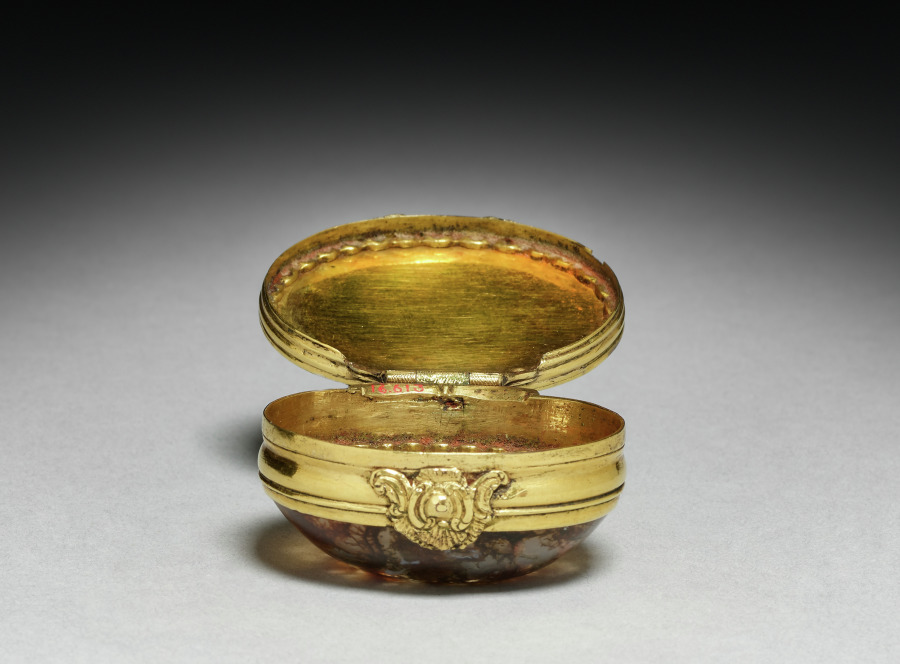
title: Box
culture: Germany, 18th century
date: 1730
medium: agate and gold or gilt metal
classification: Miscellaneous